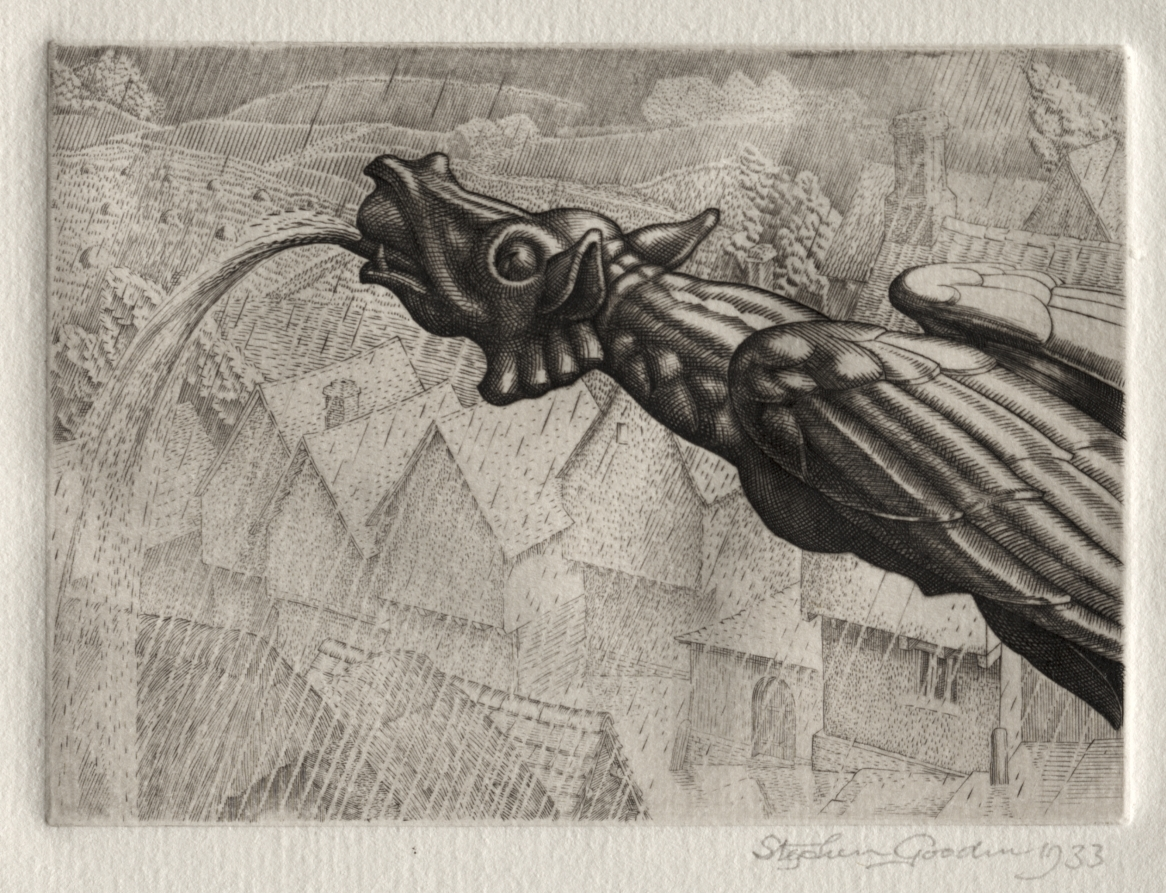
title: Illustration for "Peronnik the Fool": A Gargoyle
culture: England, 20th century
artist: Stephen Gooden (British, 1892–1955)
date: 1933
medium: engraving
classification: Print